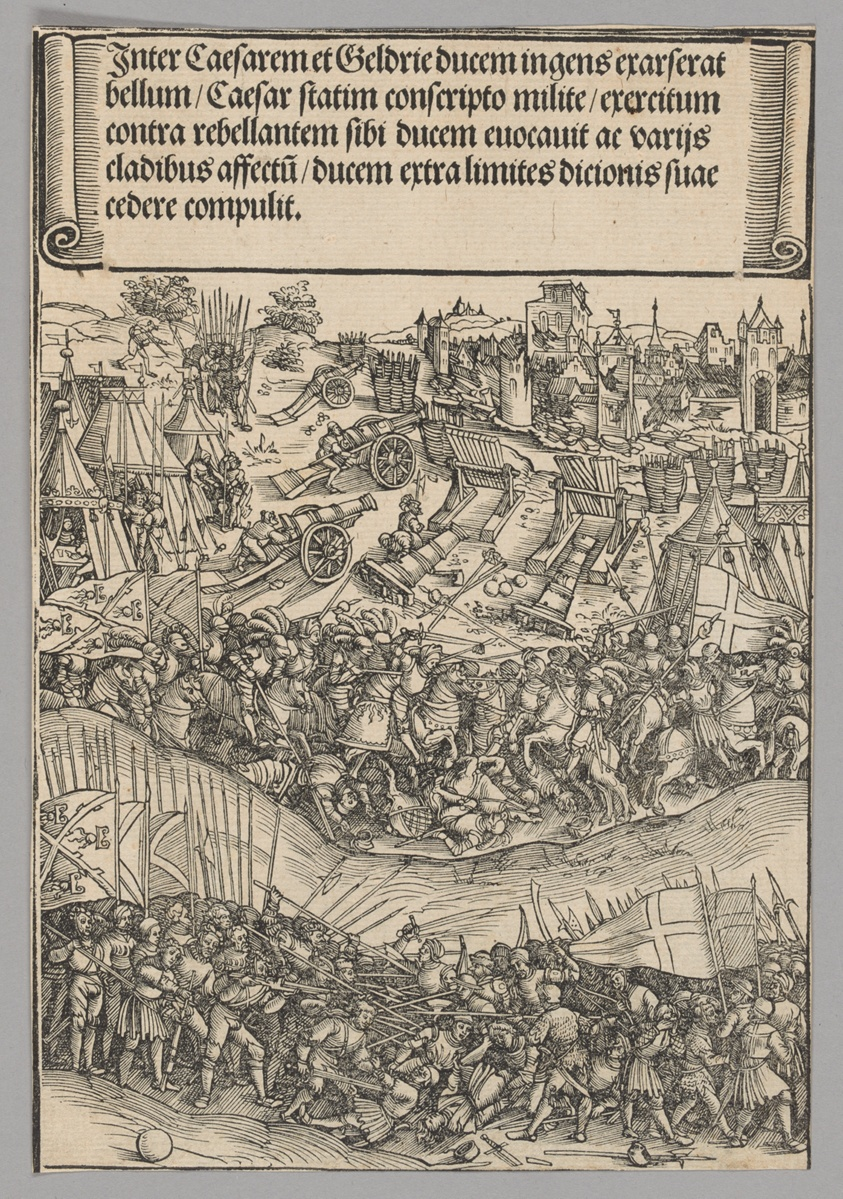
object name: Print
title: War with Guelders, plate 5 from Historical Scenes from the Life of Emperor Maximilian I from the Triumphal Arch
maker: Wolf Traut (German, c. 1480-1520); printed by Hieronymus Andreae (German, died 1556)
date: 1515-17, printed c. 1520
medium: Woodcut in black ink on cream laid paper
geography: Germany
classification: print; paper; woodcut; prints and drawing